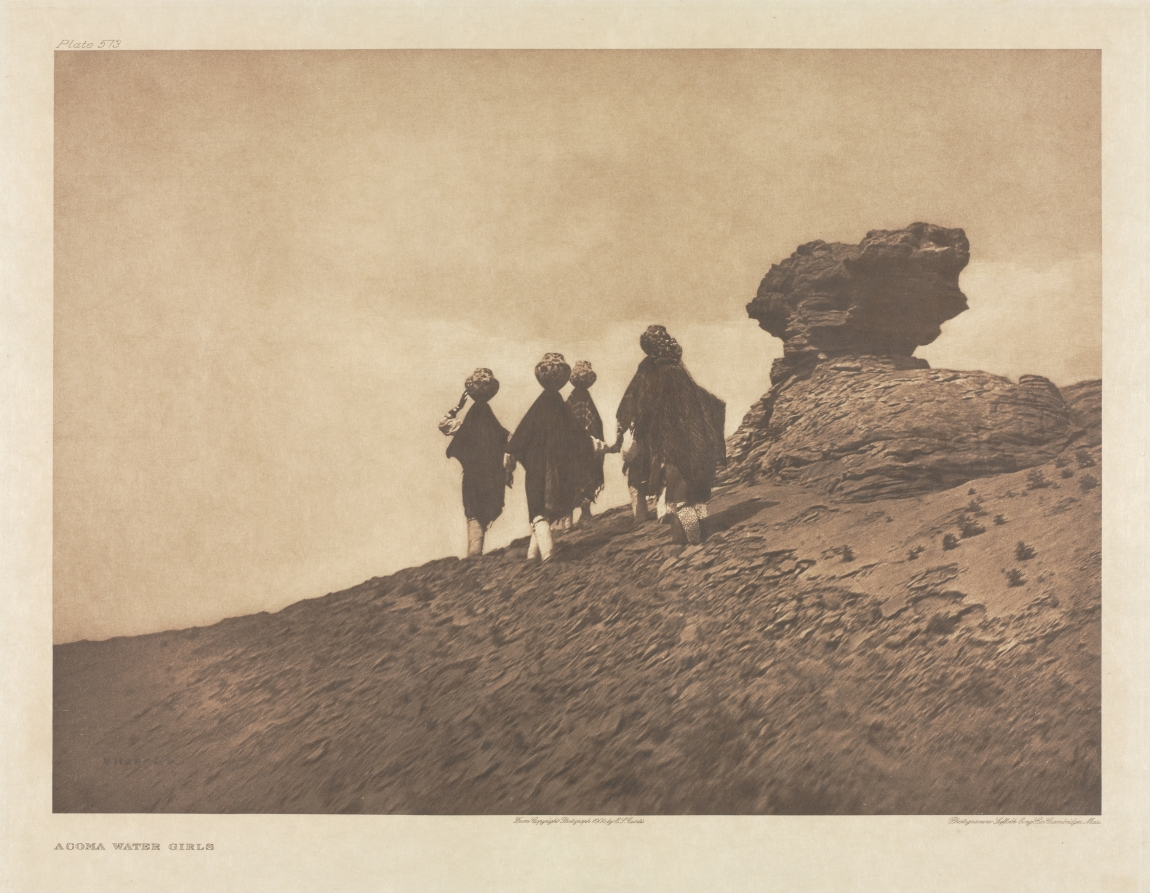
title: Portfolio XVI, Plate 573: Acoma Water Girls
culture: America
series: The North American Indian: being a series of Portfolios picturing and describing the Indians of the United States, the Dominion of Canada, and Alaska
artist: Edward S. Curtis (American, 1868–1952)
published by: The University Press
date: 1904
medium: photogravure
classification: Portfolio